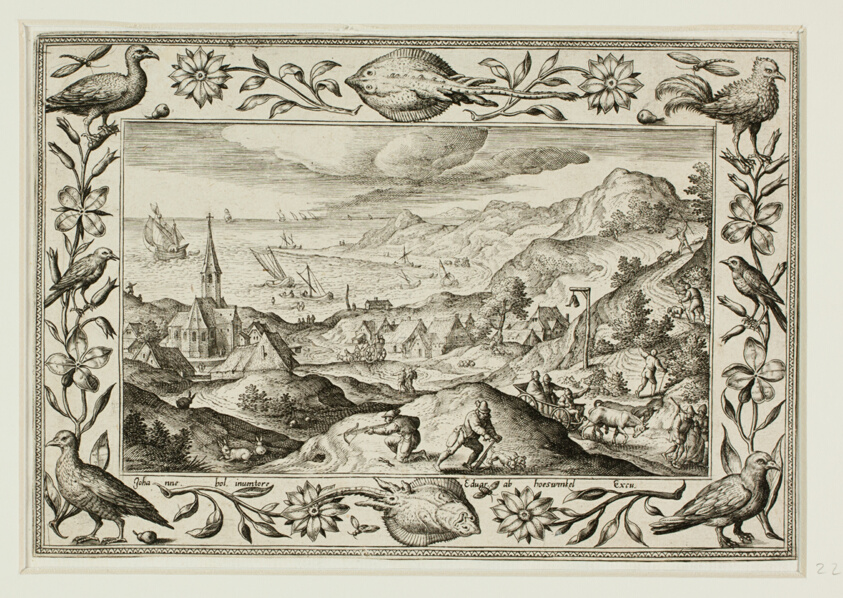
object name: Print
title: Rabbit Hunt, from Landscapes with Old and New Testament Scenes and Hunting Scenes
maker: Adriaen Collaert (Flemish, c. 1560–1618); after Hans Bol (Flemish, 1535–1593); published by Anna van Hoeswinckel (Flemish)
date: 1584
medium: Engraving in black on cream laid paper, laid down on cream laid paper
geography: Flanders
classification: engraving; paper; print; prints and drawing